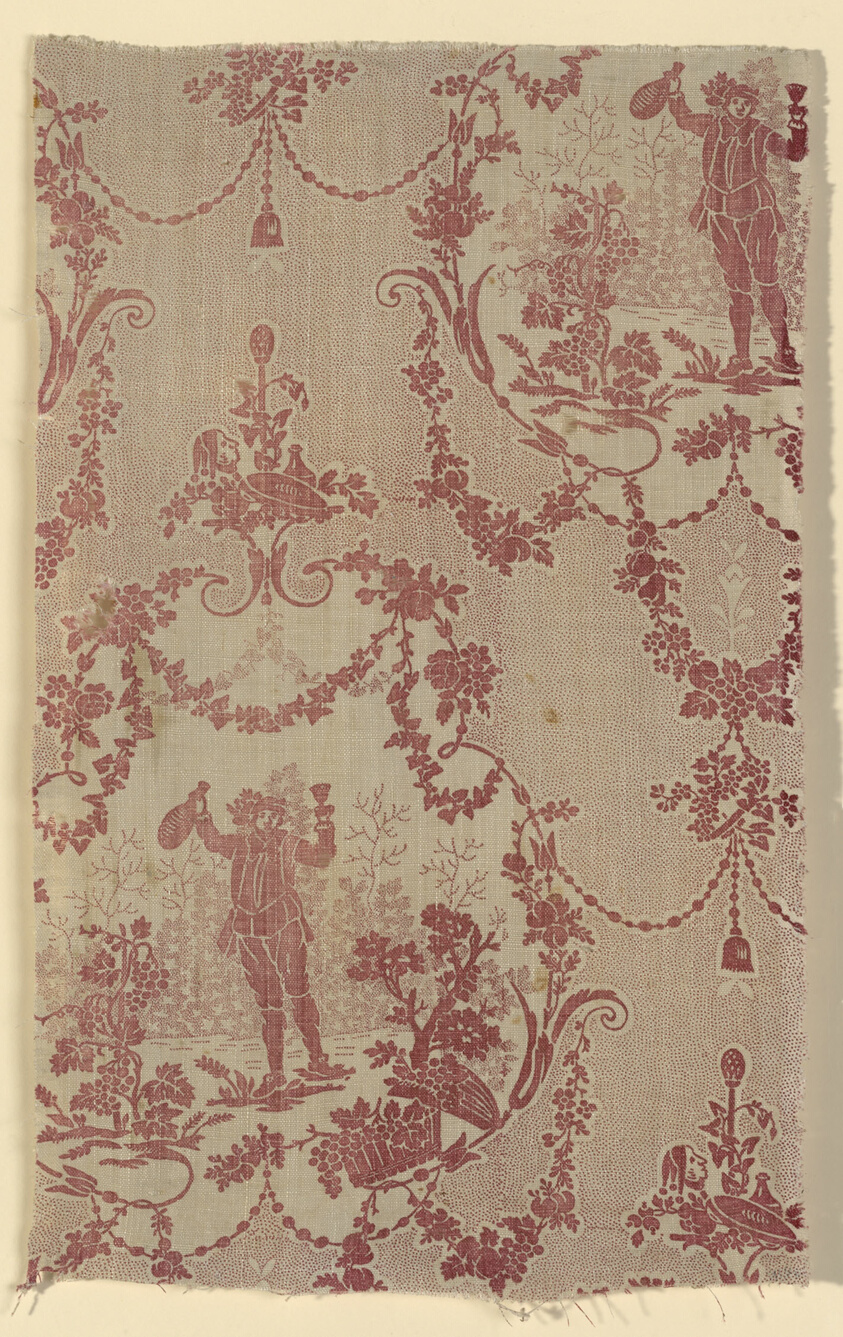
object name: Textile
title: Le Petit Buveur (The Little Drinker) (Furnishing Fabric)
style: jouy-en-Josas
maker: Engraved by Francois Antoine Aveline (French, 1718-1787) after Antoine Watteau (French, 1684-1721); France, Jouy-en-Josas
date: 1765/70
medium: Cotton, plain weave; block printed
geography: France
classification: textile; weaving - printed; furnishing textile